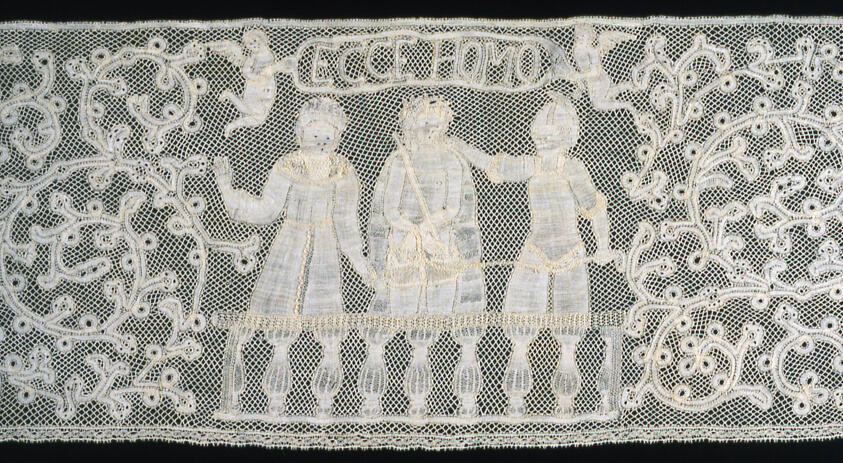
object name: Textile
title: Border (From an Altar Cloth)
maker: Italy, Milan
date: 1725/75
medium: Linen, bobbin part lace; embellished with glass beads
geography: Milan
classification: textile; lace - bobbin